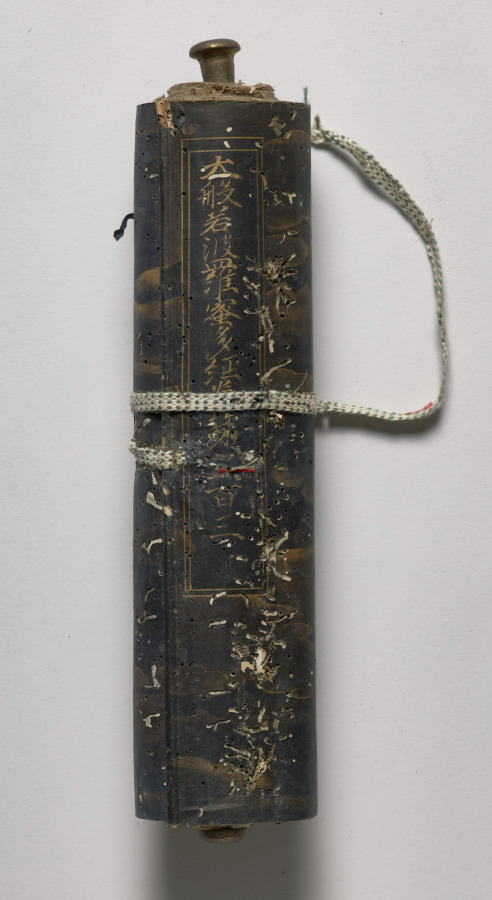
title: Volume from the Great Perfection of Wisdom Sutra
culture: Japan, Heian period (794–1185)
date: late 1100s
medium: Handscroll; ink and gold on dyed paper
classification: Manuscript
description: This scroll is part of the 600-volume Great Perfection of Wisdom Sutra. The sacred text addresses the perfection of wisdom and the nonsubstantiality of all phenomena, or the emptiness of all things. It takes the form of Shakyamuni Buddha’s preaching at four locations. This scroll is from the Perfection of Wisdom in 100,000 Lines, which occupies the first 400 volumes. At one time, religious clergy kept all the scrolls in a lacquered wood repository on view nearby. They are now too fragile to open and we will conserve them over time.